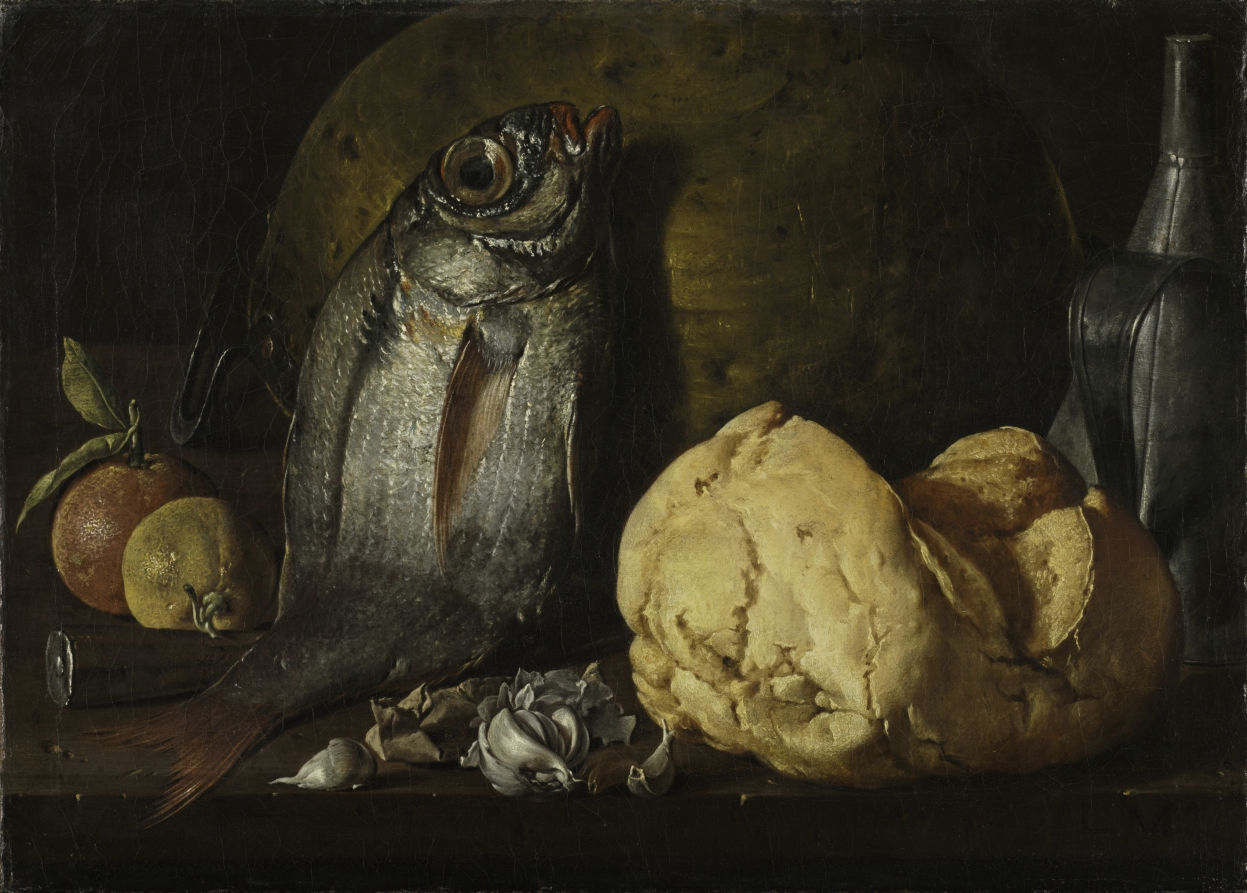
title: Still Life with Fish, Bread, and Kettle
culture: Spain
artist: Luis Meléndez (Spanish, 1716–1780)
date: c. 1772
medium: oil on canvas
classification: Painting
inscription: Signed lower right: "L.M.[z]"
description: During the 1760s, after painting portraits and portrait miniatures with his father, Meléndez began to specialize in still lifes. Active mainly in Madrid, he is regarded as the finest Spanish still-life painter of the 18th century, but he spent much of his life in poverty.